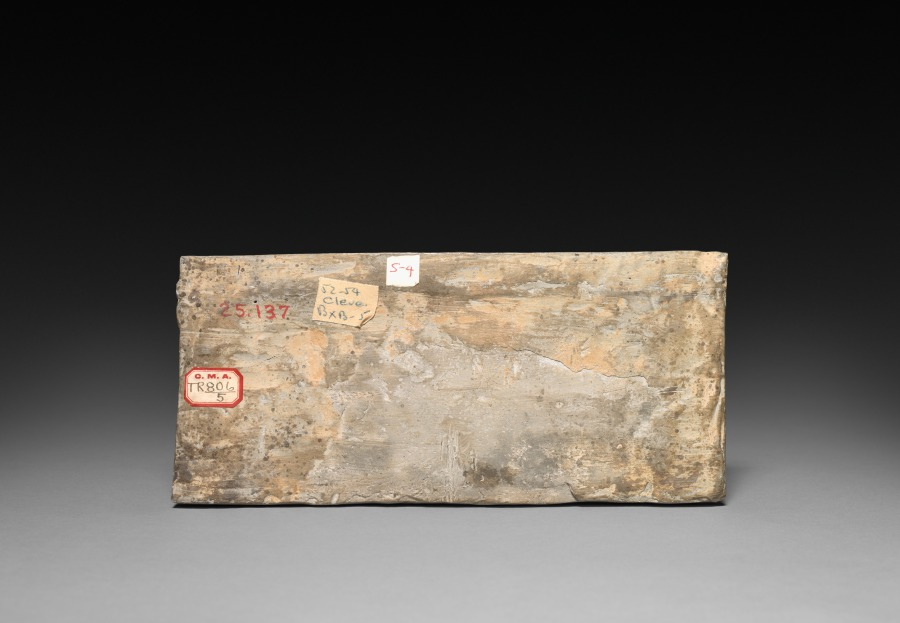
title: Relief with Rampant Tiger and Boar from a Funerary Stove Model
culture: China, from a tomb in Xi'an, Shaanxi province, Han dynasty (202 BCE–220 CE)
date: 202 BCE–220 CE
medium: earthenware with relief decoration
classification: Ceramic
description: This pottery panel and 1925.140 were made in molds to be joined with other panels to build a miniature stove. The panels, however, are not complete and presumably do not belong together. This panel depicts a tiger attacking a boar.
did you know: Han dynasty tombs were often furnished with grave goods to provide the deceased with items for the afterlife.